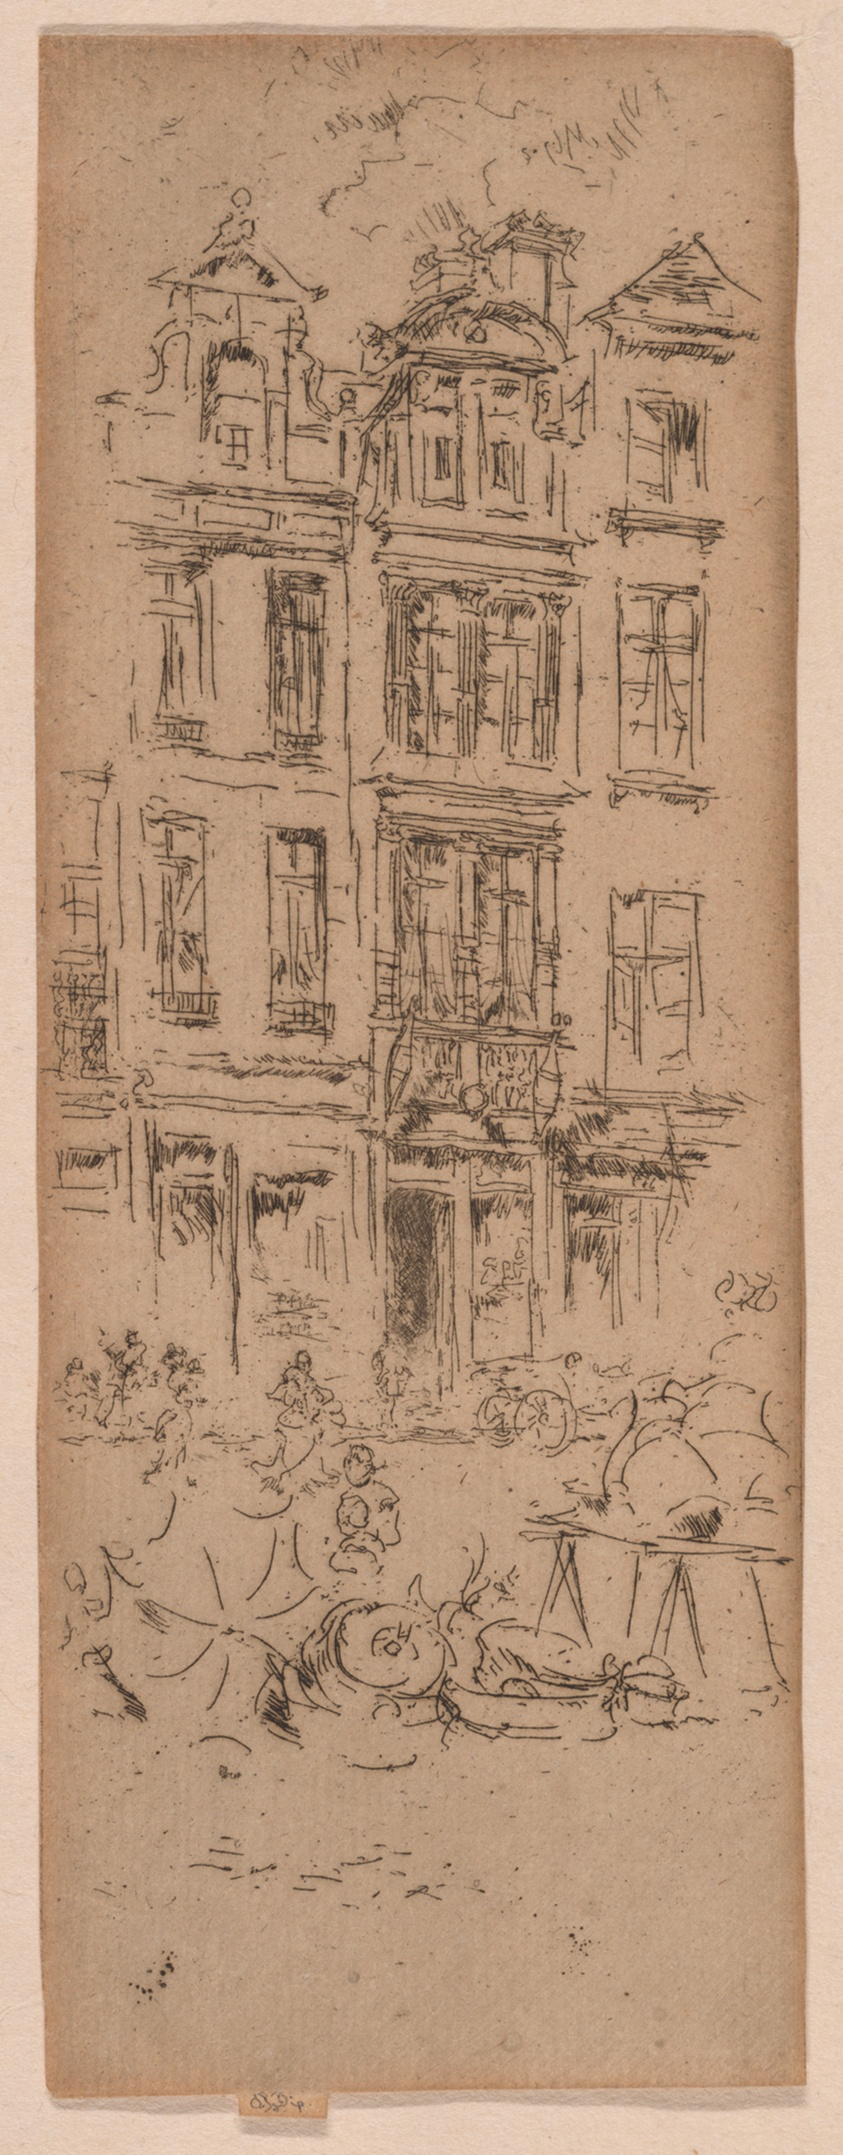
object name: Print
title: Flower Market, Brussels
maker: James McNeill Whistler (American, 1834-1903)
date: 1887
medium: Etching and drypoint in black on cream laid paper (discolored to tan)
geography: United States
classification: etching; print; drypoint; paper; prints and drawing